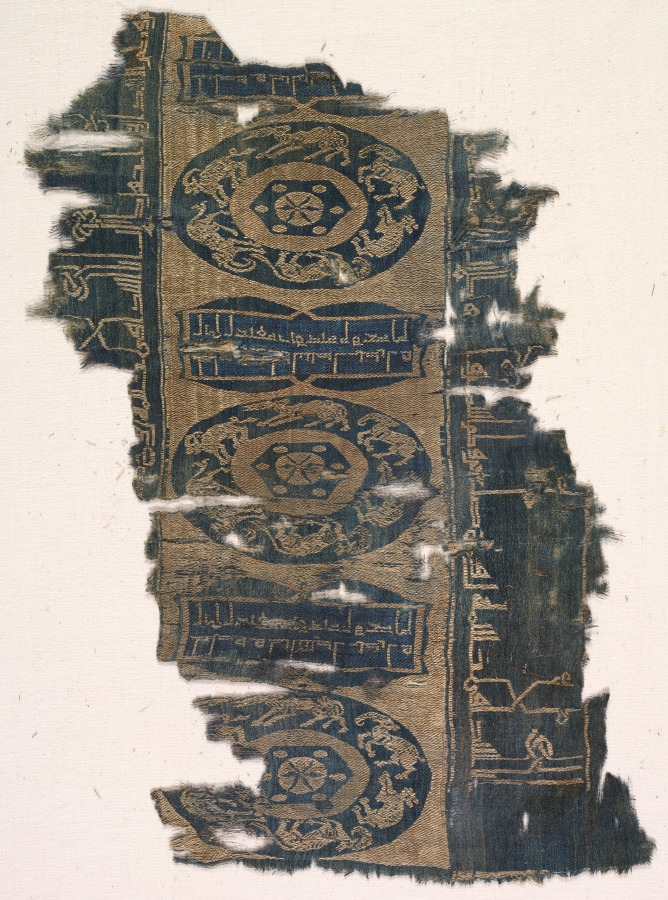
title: Fragment with running animal roundels and kufic inscriptions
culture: Iran, in the style of the Buyid period (945–1055)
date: 1530–1950 (radiocarbon date, 95% probability)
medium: Silk: lampas weave, brocaded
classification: Textile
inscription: [daygha]m wa-kam asadan rawwa'a juhur kilab aya asadan fi jismihi ruh. . .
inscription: . . .aya asadan fi jismihi ruh daygham wa-kam asadan rawwa'a [ju]hur kilab aya asadan fi. . .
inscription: inni i'taqadtu bi-wa'idka wa-'adlika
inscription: wa-arhab ihsanika [wa-fad]lika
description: This fragment preserves a wide central band flanked by narrower inscription bands. The narrower bands contain, on a dark blue background a continuous inscription in elaborate Kufic, the ivory-colored lettering oriented at right angles to the warp. On the wider ivory panel there appear ovals enclosing a frieze of running animals within which are hexagons enclosing stars. The ovals alternate vertically with cartouches containing an inscription in simple Kufic, the design appearing in blue, pink, and ivory.